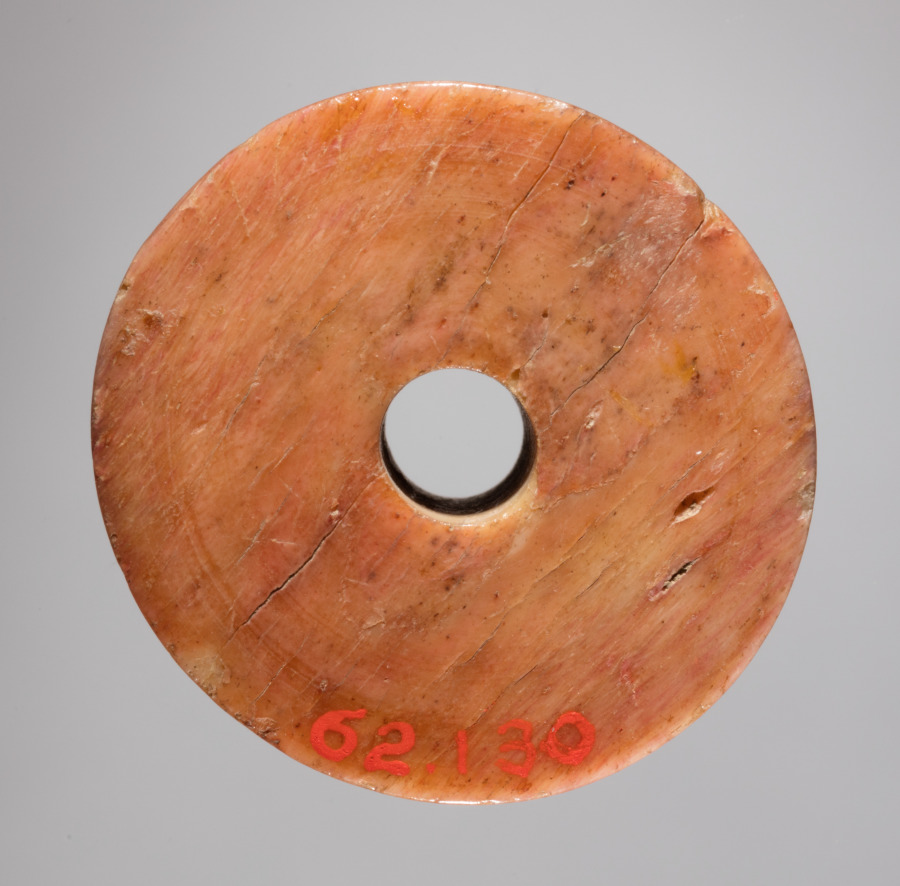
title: Spindle Whorl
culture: Iran, early Islamic period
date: 700s - 900s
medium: bone, incised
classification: Spindle Whorl